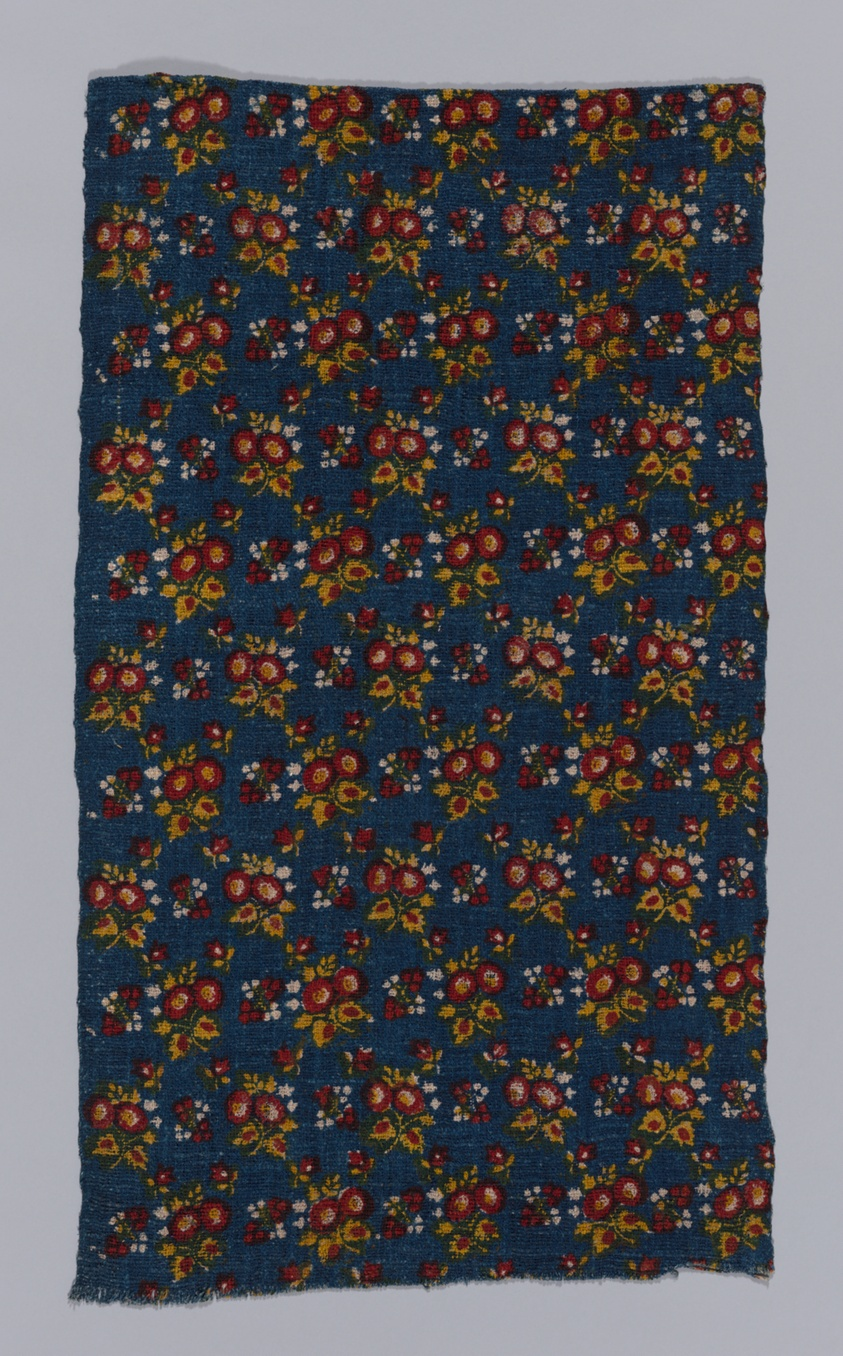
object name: Textile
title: Fragment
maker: Russia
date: 19th century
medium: Linen, plain weave; painted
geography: Russia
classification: textile; weaving - printed; weaving; printed textile